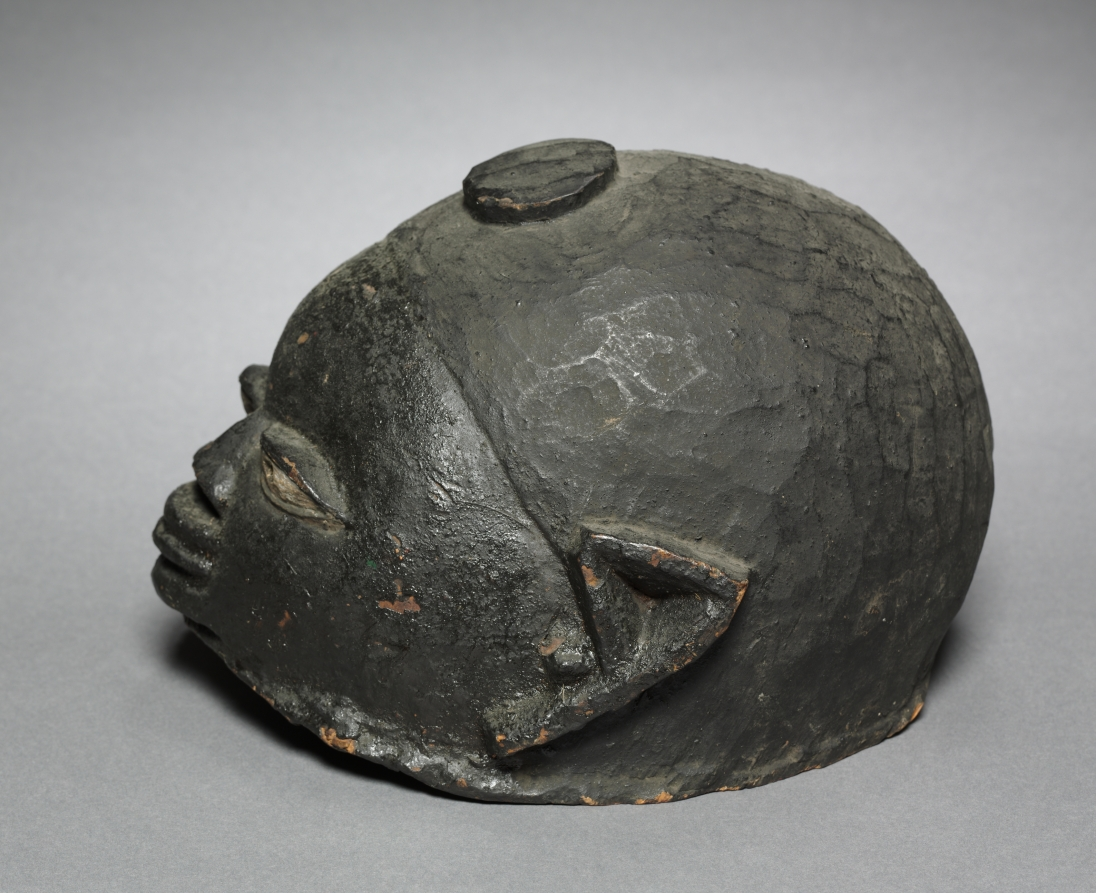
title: Mask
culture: Africa, West Africa, Nigeria, Yorùbá-style maker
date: c. 1910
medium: Wood and paint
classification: Mask